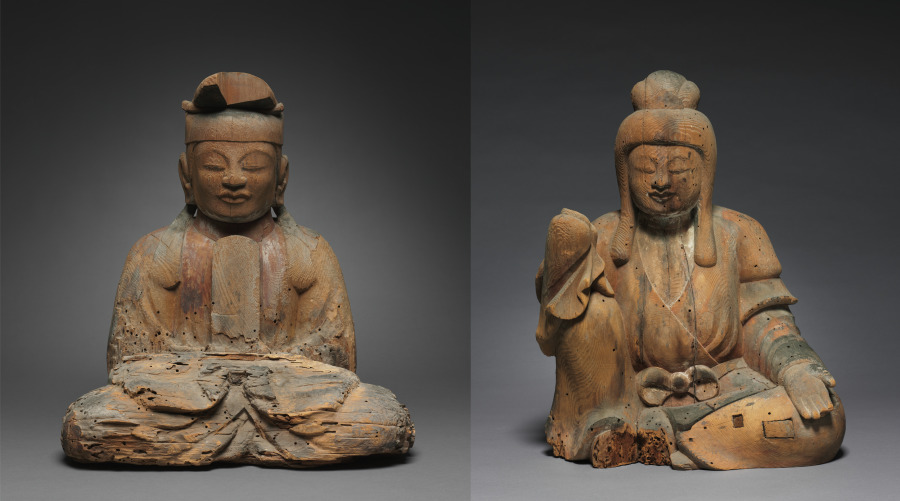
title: Shinto Deities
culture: Japan, Heian period (794–1185)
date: 900s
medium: wood, with traces of polychromy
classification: Sculpture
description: These sculptures represent kami, the name for deities associated with the Japanese religious tradition known as Shinto. They are said to have originally been created for the Usa Hachiman shrine in Oita on the island of Kyushu. Usa Hachiman Shrine houses four main kami: Hime Okami, who assists those engaged in agriculture and sea travel; the legendary 5th-century emperor Ojin deified as the kami Hachiman; Empress Jingu; and the kami of Mount Kawara, who aids copper miners. The identities of these two figures are unknown, but they belong to a larger group containing at least three other deities.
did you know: Traces of pigment on the surface of these sculptures indicate they were once painted.